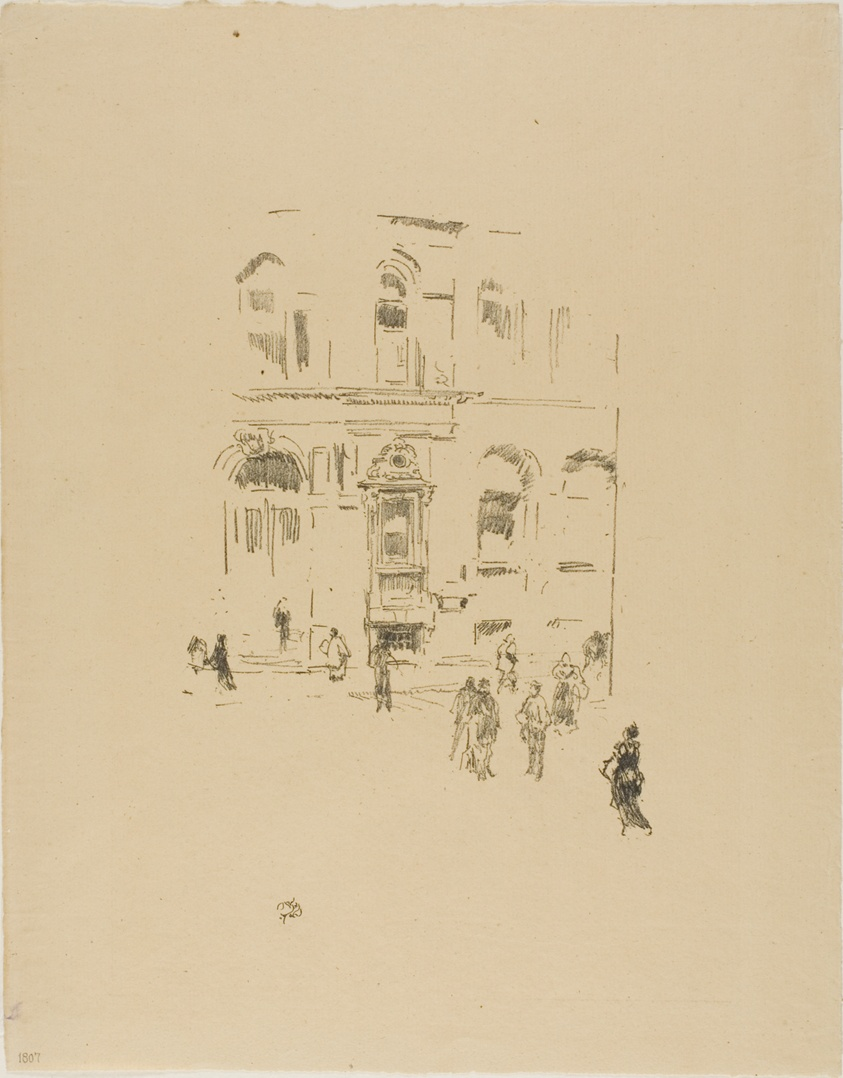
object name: Print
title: Victoria Club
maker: James McNeill Whistler (American, 1834-1903)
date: 1879/87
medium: Transfer lithograph in black ink with scraping, on tan laid paper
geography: United States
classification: transfer lithograph; lithograph; print; prints and drawing; paper